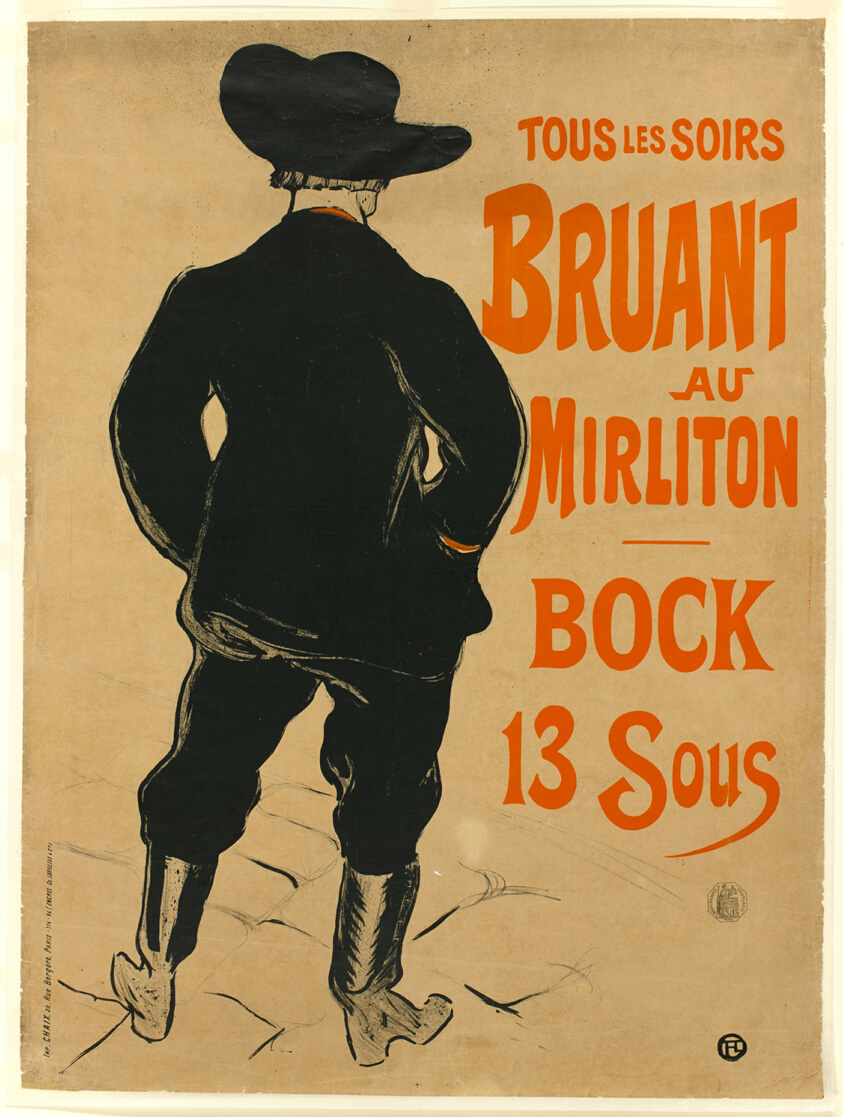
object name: Print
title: Aristide Bruant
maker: Henri de Toulouse-Lautrec (French, 1864-1901)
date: 1893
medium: Color lithograph poster on tan wove paper, laid down on white wove Japan tissue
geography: France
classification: lithograph; poster; print; prints and drawing